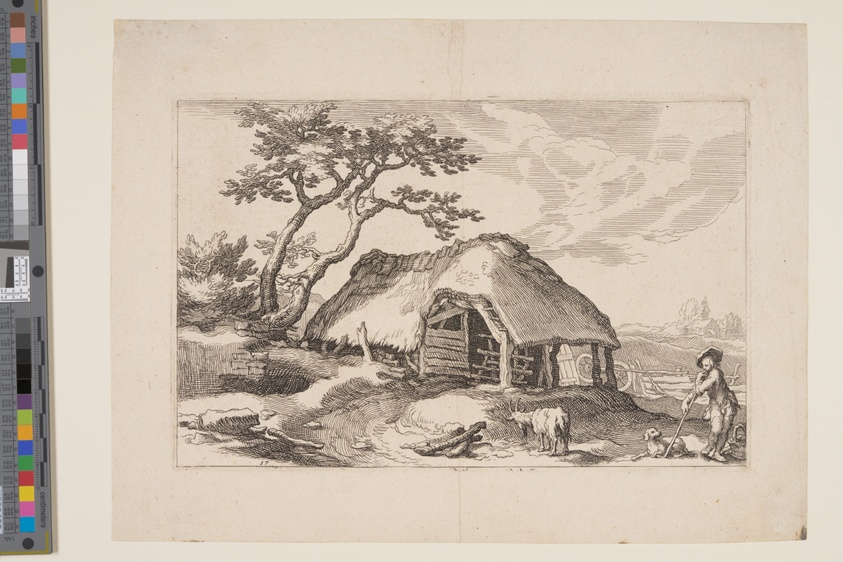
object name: Print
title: Plate 17, from Landscapes with Farmhouses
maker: Boëtius Adamsz. Bolswert (Flemish, 1580–1633); after Abraham Bloemaert (Dutch, 1566–1651)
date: 1614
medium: Etching on ivory laid paper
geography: Flanders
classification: print; paper; prints and drawing; etching